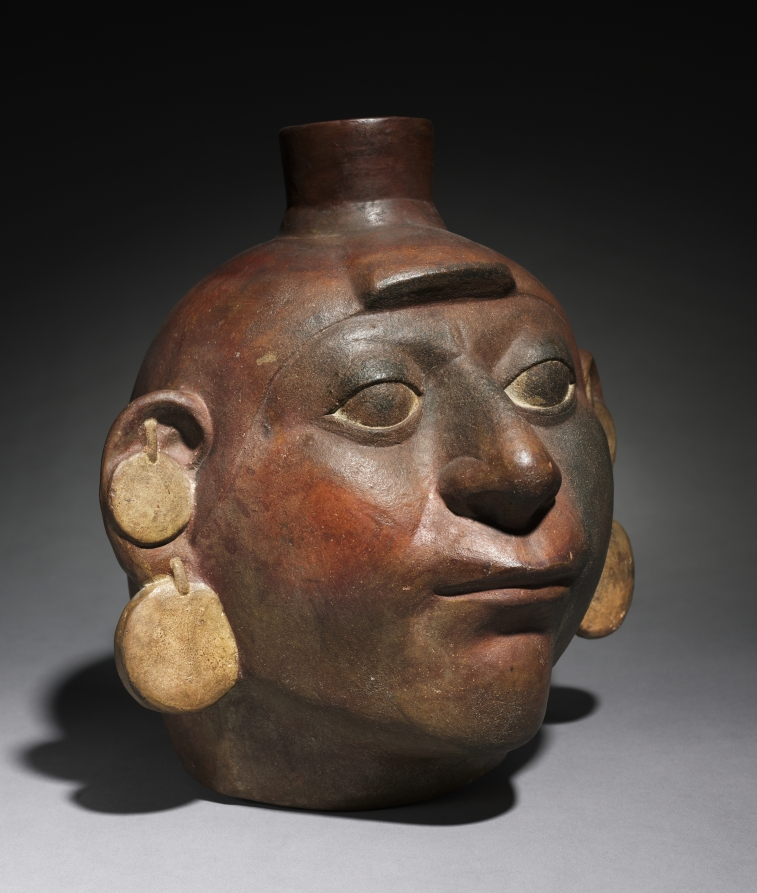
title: Portrait Head Vessel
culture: Peru, North Coast, Moche style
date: 200–550 CE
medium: earthenware with colored slips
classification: Ceramic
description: The Moche were unique in ancient Peru in creating realistic human portraits, usually in the form of ceramic vessels. This large example may represent an important captive who, like some Moche prisoner figures, wears double earrings and a hank of hair over the forehead.